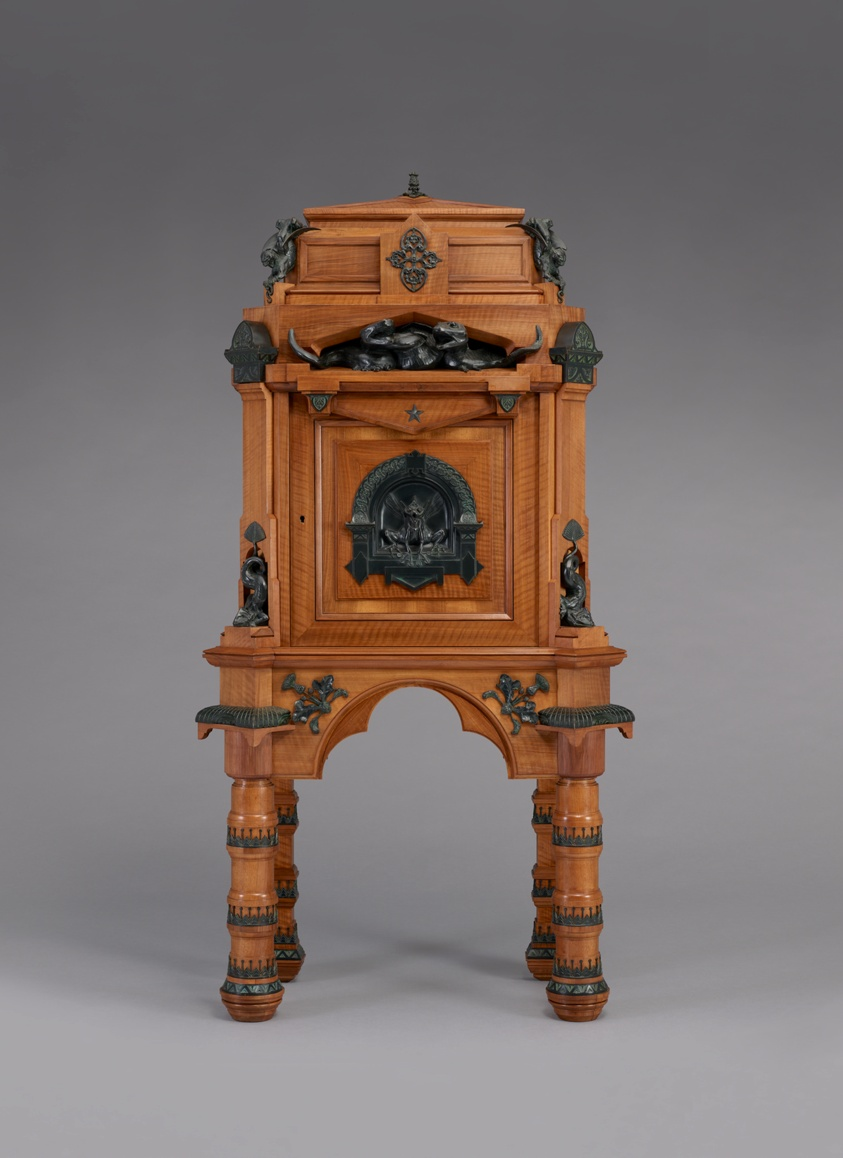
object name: Furniture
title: Cigar Cabinet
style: Neogothique, 19th century, gothic revival, merovingian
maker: Made by Charles-Guillaume Diehl (German, active in Paris, 1811–1885); Designed by Jean-Eugene Brandely (French, active 1867–1873); Bronzes modeled by Emmanuel Fremiet (French, 1824–1910); Paris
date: c. 1867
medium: Oak, cedar and walnut veneers, patinated bronze, and caning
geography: Paris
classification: furniture; humidor; european decorative arts; cabinet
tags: lizards, merovech, merovee, quatrefoil, smoking, cigars, tobacco